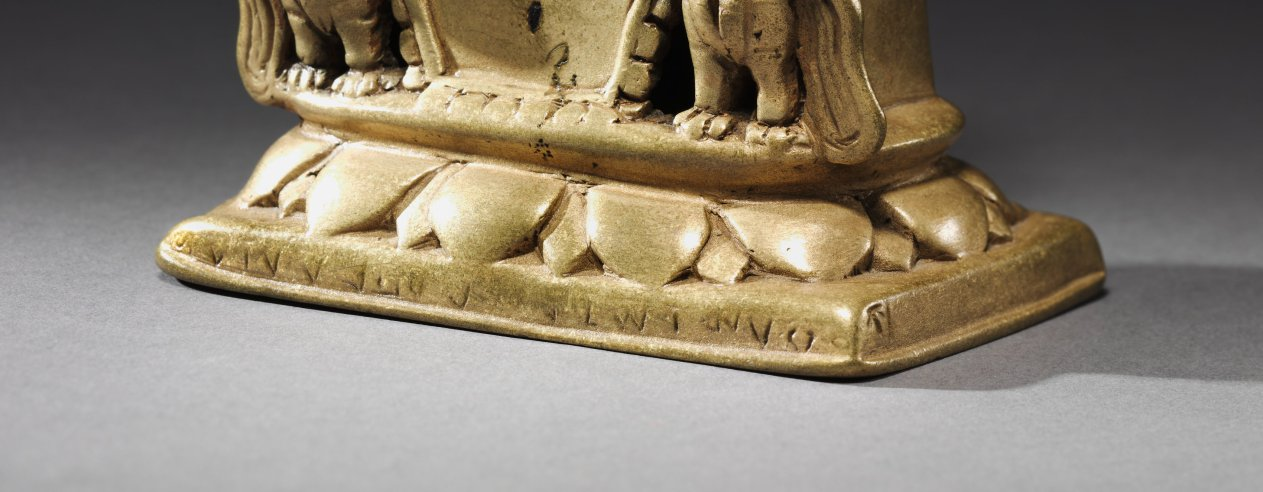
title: Crowned Buddha Seated on a Lion Throne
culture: India, Kashmir, 8th century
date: 700s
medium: brass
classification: Sculpture